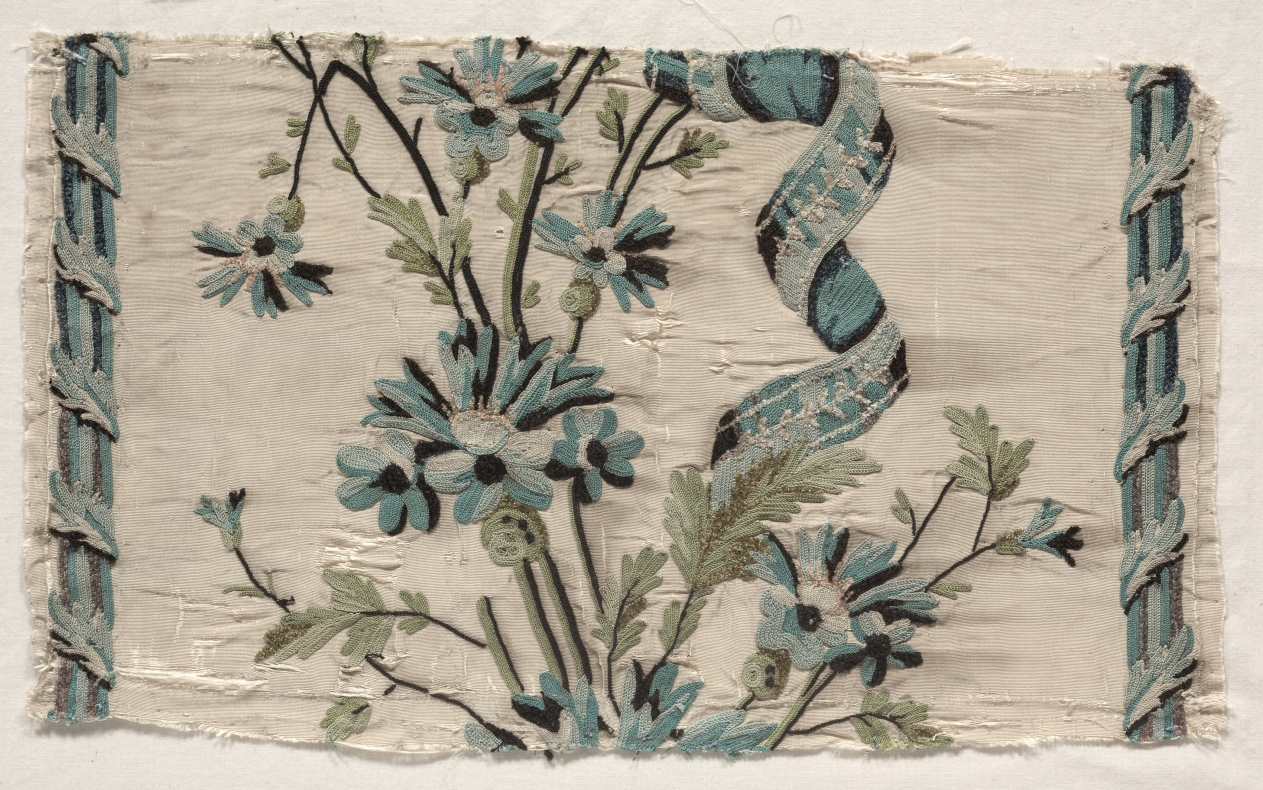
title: Two Pieces of Embroidery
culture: France, 18th century, Period of Louis XV (1723-1774)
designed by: Philippe de Lasalle (French, 1723–1805)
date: 1723–1774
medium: embroidery, silk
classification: Embroidery